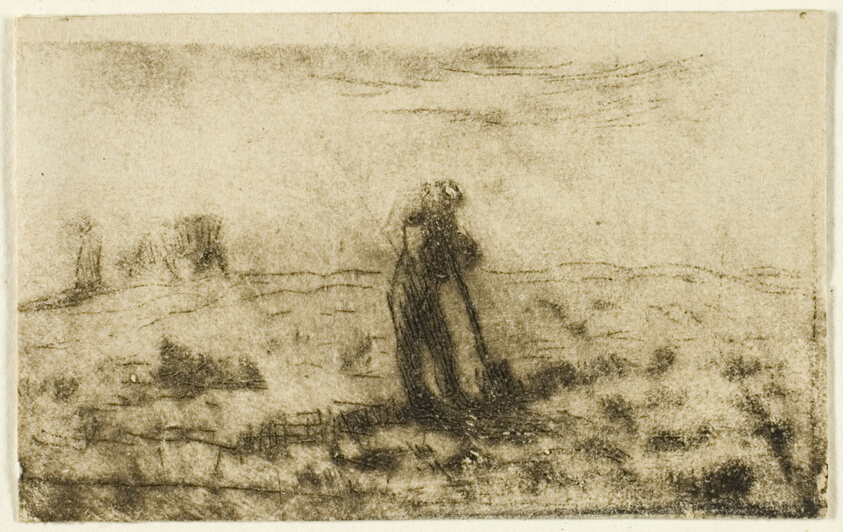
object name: Print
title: Woman Hanging Out Clothes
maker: Jean François Millet (French, 1814-1875)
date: c. 1855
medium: Etching and drypoint on ivory wove paper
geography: France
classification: etching; print; prints and drawing